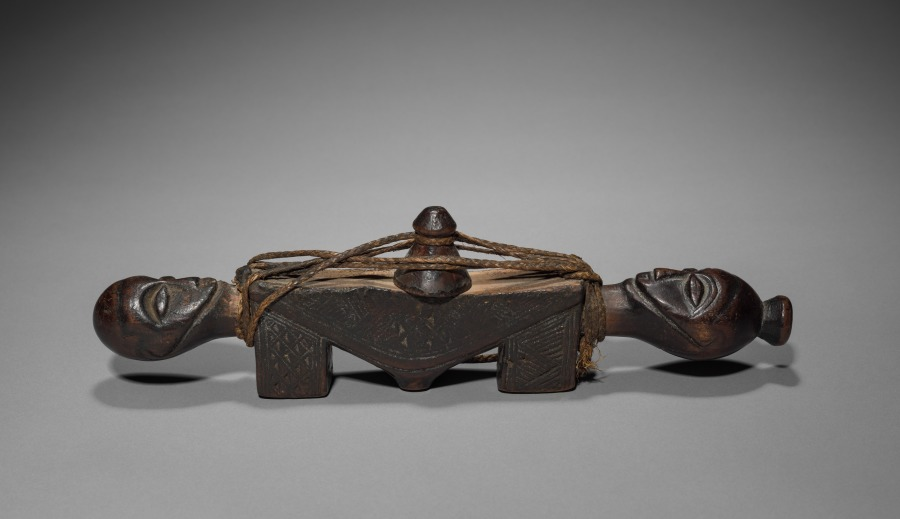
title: Divination Implement (itombwa)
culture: Africa, Central Africa, Democratic Republic of the Congo, Kuba-style maker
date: 1890–1910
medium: Wood and plant fiber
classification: Sculpture